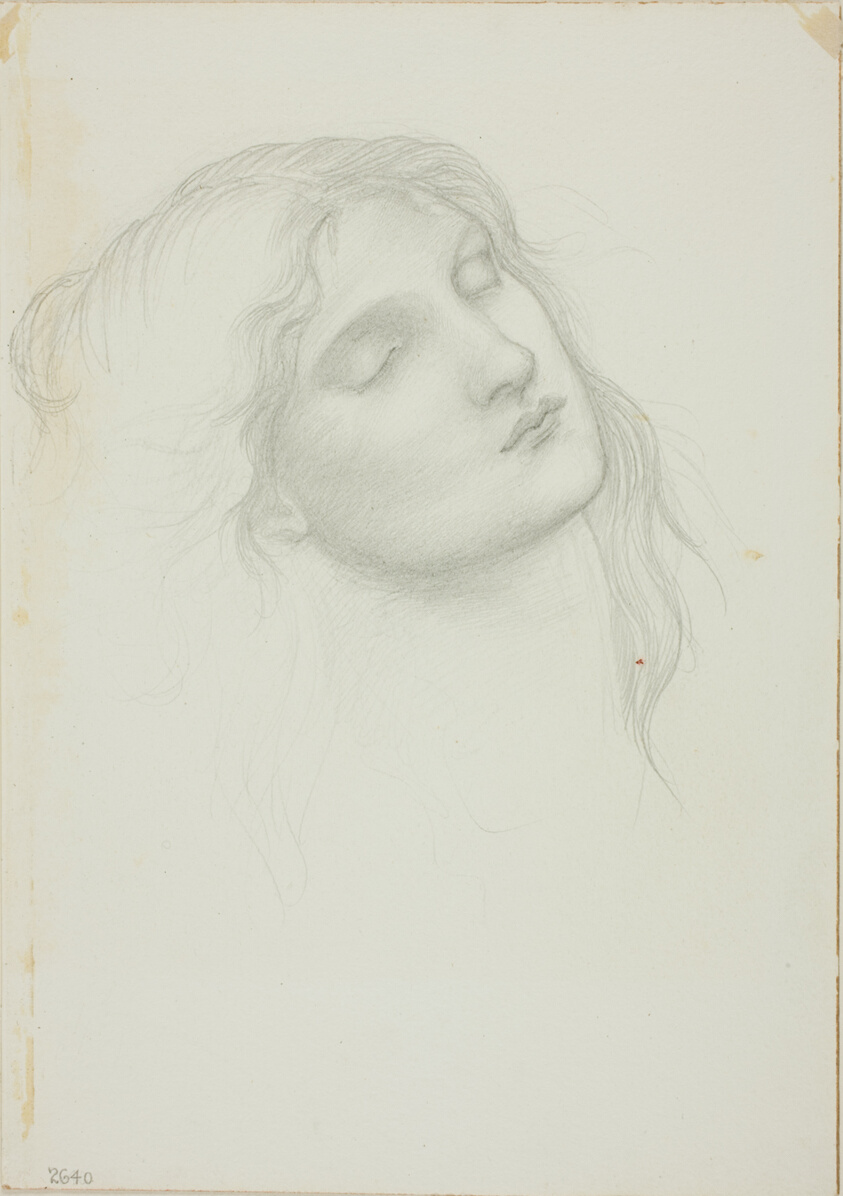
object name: Drawing and Watercolor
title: Head of Woman with Eyes Closed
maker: Sir Edward Burne-Jones (English, 1833-1898)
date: c. 1873–77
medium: Graphite on ivory wove paper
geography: England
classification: graphite; drawings (visual works); prints and drawing